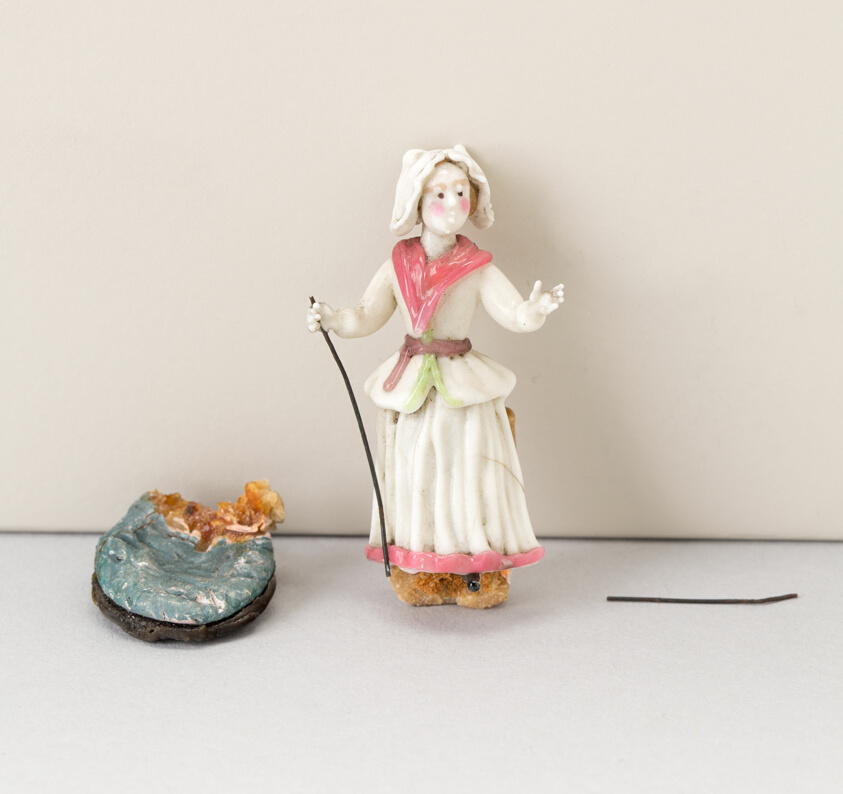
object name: Glass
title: Girl with Staff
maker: Nevers, France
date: 18th century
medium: Glass; lampwork (verre de Nevers), metal armature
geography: France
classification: glass; miniature; decorative object/ornament; european decorative arts